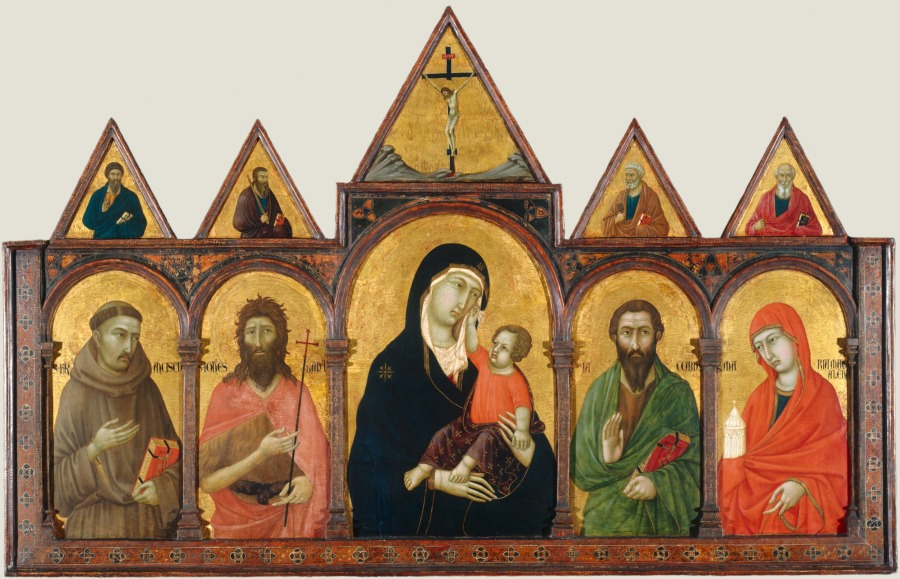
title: Virgin and Child with Saints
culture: Italy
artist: Ugolino di Nerio (Italian)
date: c. 1320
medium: tempera and gold on wood panel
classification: Painting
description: In medieval Italian churches, painted altarpieces served as the focal point for worshippers during the rituals of faith. The figures of Jesus, Mary, and eight saints are framed by a golden background that would have glistened in the flickering candlelight of the church.